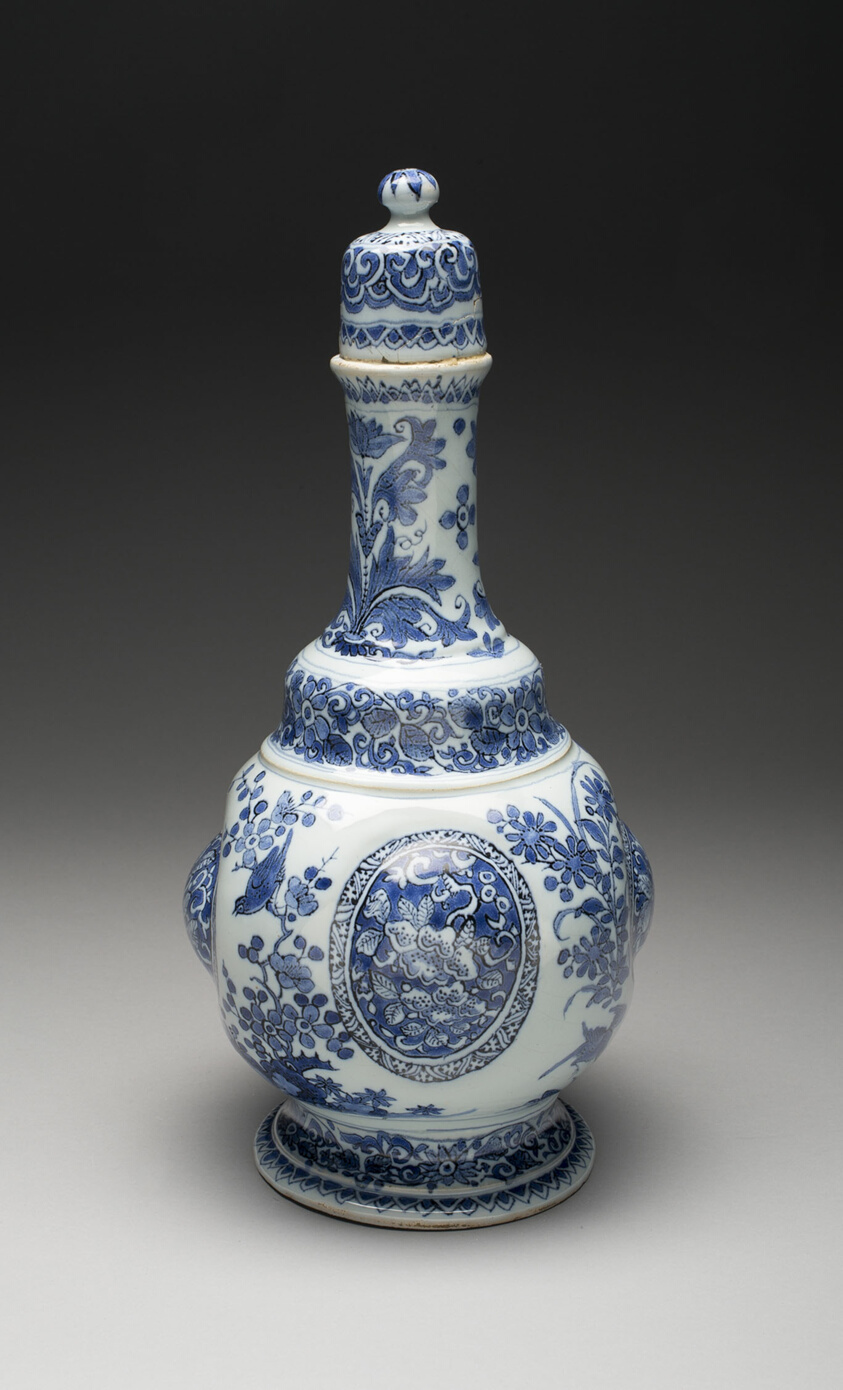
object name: Ceramics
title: Bottle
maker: De Grieksche A (The Greek A) Factory; Delft, Netherlands, 1658-1811; Samuel van Eenhoorn; Dutch, 1655-1686/87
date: c. 1678-85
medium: Tin-glazed earthenware (Delftware)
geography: Delft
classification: earthenware; european decorative arts; tin-glazed ware; ceramics